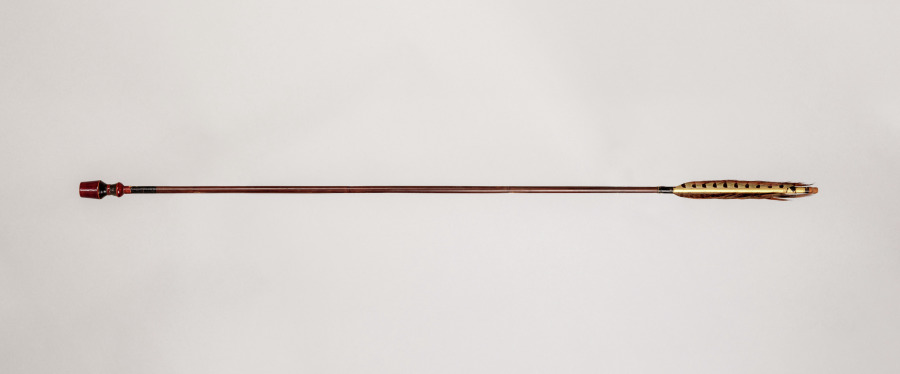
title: Arrow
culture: Japan, Edo period (1615–1868)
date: 1700s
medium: bamboo shaft tipped with wooden point and heeled with feathers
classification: Arms and Armor